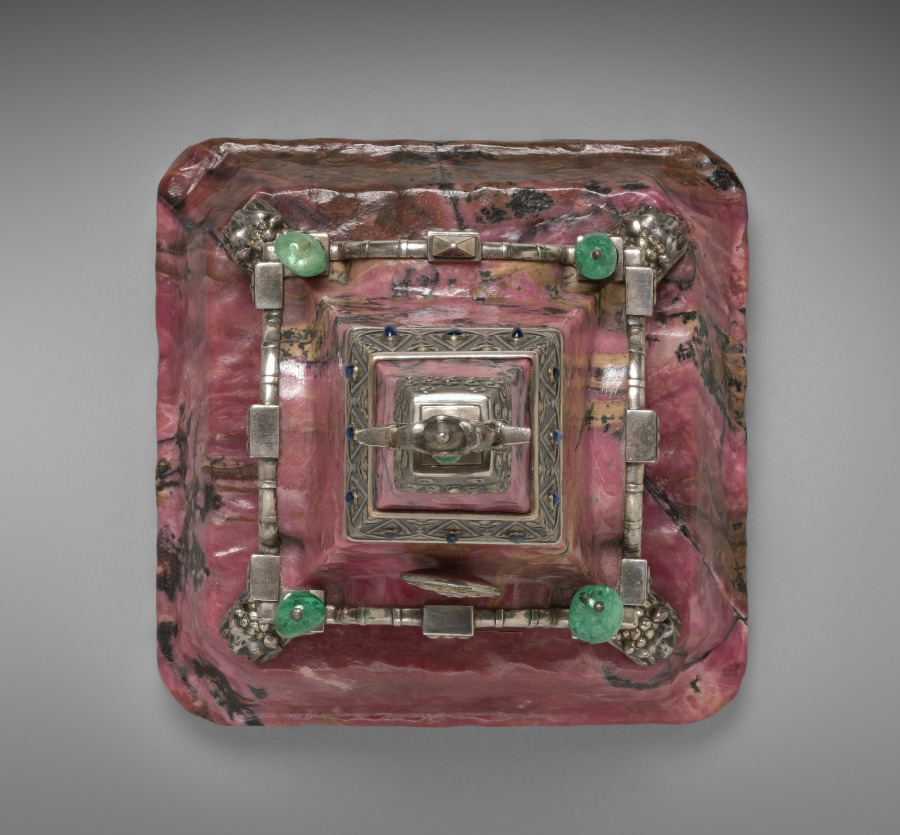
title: Kremlin Tower Clock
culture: Russia, St. Petersburg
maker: House of Fabergé (Russian, 1842–1918)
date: c. 1913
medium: rhodonite, silver, enamel, emeralds, sapphires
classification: Timepiece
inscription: 84, Kokoshnik, delta [assay mark for Moscow, 1908-26]; 91, Kokoshnik; 91; Kokoshnik; C. Fabergé (in Cyrillic); double-headed eagle [imperial warrant]; 16419 k? scratched.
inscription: Painted on clock face: Le Gruet (in script); strike, silence, set hand work (in English).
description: The use of Russian hardstones in creating precious objects became a hallmark of design from the House of Fabergé. Easily carved, these minerals were sourced largely from the western region surrounding the Ural Mountains. Fabergé's workmasters used colorful stones such as agate, nephrite (jade), lapis lazuli, rock crystal, and rhodonite, seen here in this elaborate table or mantel clock, to create all manner of luxurious accessories. Bright pink rhodonite was among the rarest, and consequently most expensive, specimens used by the House of Fabergé. This clock resembles the Taynitskaya Tower, the middle tower on the south side of the Kremlin. The House of Fabergé created this work to commemorate the 300th anniversary of the Romanov dynasty, representing Fabergé's ability to balance the functionality of objects with intricate decorative design.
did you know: The Kremlin tower, which this clock resembles, has a secret well and an underground tunnel that leads to the Moscow River.